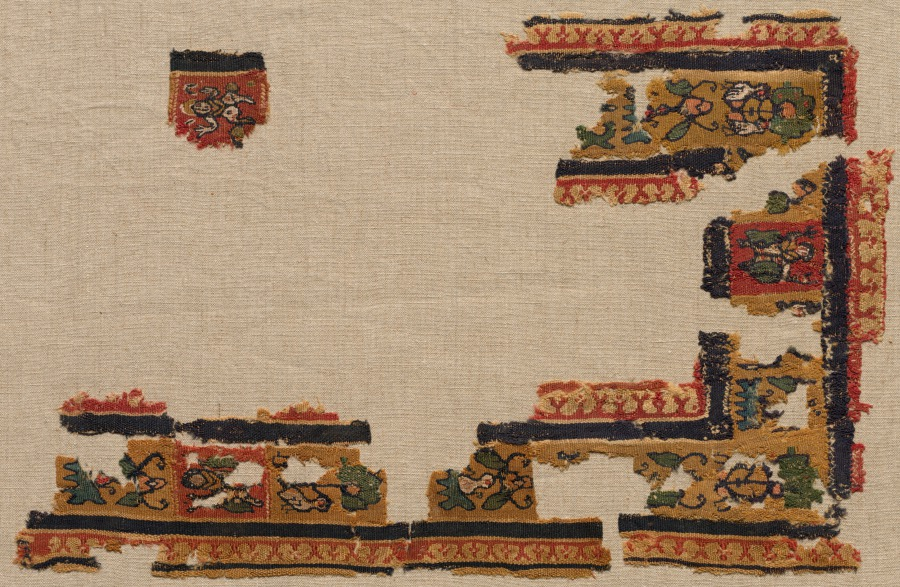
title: Fragments of a Tunic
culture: Egypt, Byzantine period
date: 400s - 600s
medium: tabby weave, inwoven tapestry ornament; wool and linen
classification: Textile